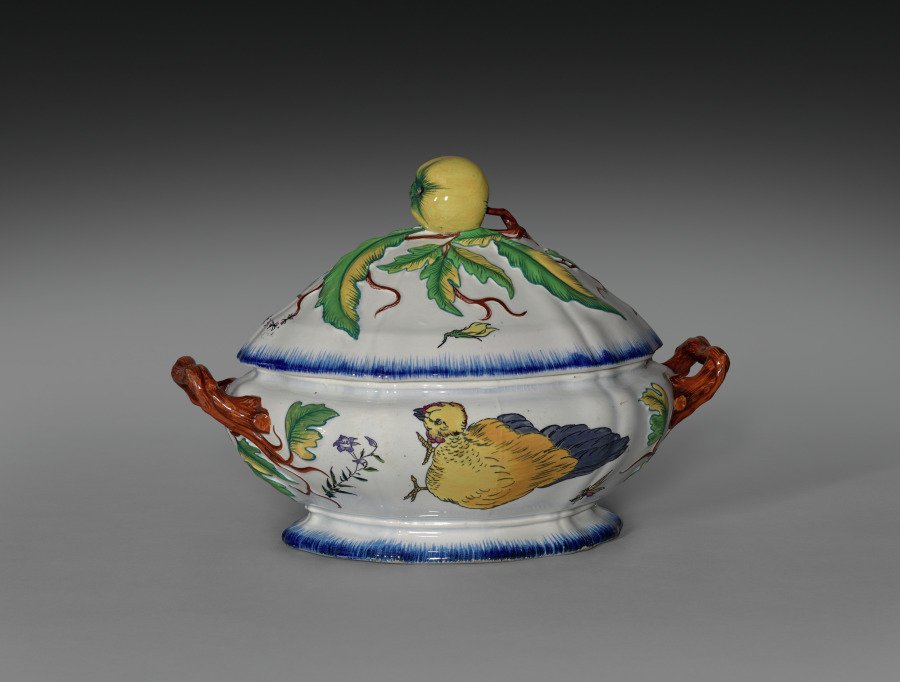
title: Covered Tureen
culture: France, Creil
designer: Félix Bracquemond (French, 1833–1914)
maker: Creil Factory (French)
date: 1866–75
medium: porcelain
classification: Ceramic